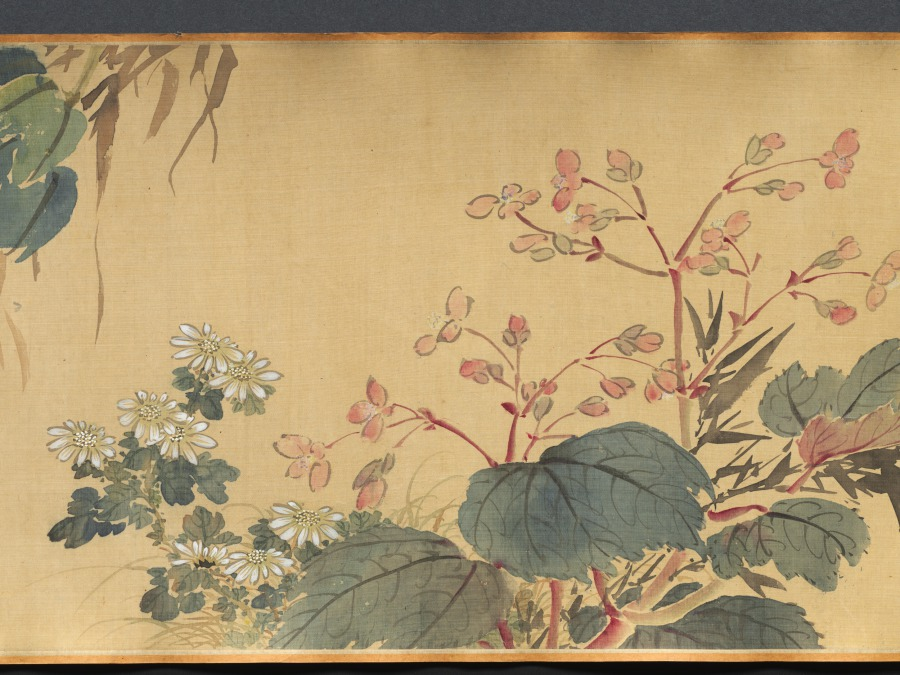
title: Flowers of Four Seasons, with Poems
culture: China, Ming dynasty (1368–1644)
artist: Wang Guxiang (Chinese, 1501–1568)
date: 1531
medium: handscroll; ink and light color on silk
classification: Painting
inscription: Artist's inscription, signature, and 15 seals. Ink Orchids. Sewn as pendants for the man of worth, swaying quiety, fragrance in the valley. [seal] Hsiao-chu ts'un Peony. Wiping his face, the young gentleman Ho [Ho Yen of Wei, Three Kingdoms] appears to have been powdered. His previous life was the perfume-stealing Han Shou [of Chin, 265–419 CE], the fragrance still lingers. [seal] Ts'un-wu chai. Flowering Crab Apple, New Bamboo. Shao-lin [Du Fu, 712–770] had to put down his brush. [Flowering Crab Apple]. Yü-k'o [Wen T'ung, d. 1079) in vain wrote poems about [Bamboo]. [seal] Yu-shih. Lotus Flowers. When she turns her head, half-hidden by a fan, and casts a glance, all the beautiful women become colorless. [seal] K'ang yüeh huai. Loquat. Ripeness in summer. [seal] Lu-chih. Pomegranate Flower. Whenever I remember you I will send my thoughts, but where have you gone--the [skirt] of pomegranate red? [seal] Wu-ho Sheng. Day Lily. Plant the day lily to forget sorrow. [seal] Yu-shih. Chrysanthemum. The untrammelled joy at the eastern fence. [seal] Lu-chih. Begonia. Comparing it to the beauties of Spring, and spreading them out as trimming for the stone steps. [seal] Yu-shih. Hibiscus. In recent years I have always enjoyed looking at flowers; instead of dark red I preferred pink ones. [seal] Jen-sheng i-lou. Narcissus, Camellia. The jade girdle left behind at Lo River. [Narcissus]. The precious pearls glitter before Spring. [Camellia]. [seal] Lu-chih. Heavenly Bamboo (Nandina domestica). A single branch in the wintry season. [seal] K'ang yüeh huai. Plum. Fragrant snow in the Lo-fou Mountains. [seal] Ts'un-wu chai. In the eleventh lunar month of the hsin-mao year of the Jiaqing era [1531], [I] imitated the boneless style of Yüan masters in sketching from life. Guxiang [seals] Yu-shih; Lu-chih. Translated by Wai-kam Ho/Lingyun Shih Liu (1980)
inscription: 2 colophons and 23 additional seals: 1 colophon dated 1632, and 2 seals of Li Jih-hua [Li Rihua] 李日華 (1565–1635); 1 colophon and 2 seals of Xiang Shengmo 項聖謨 (1597–1658); 3 seals of Liang Qingbiao 梁清標 (1620–1691); 6 seals of the Jiaqing 嘉慶 emperor (r. 1796–1820); 9 seals of Ch'eng Ch'i [Cheng Qi] 程琦 (1911–1988)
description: In this painting, flowers are loosely arranged by the seasons: narcissus and peony represent early spring; yellow loquat and lotus, summer; chrysanthemum, autumn; and the plum and evergreen bamboo, winter. The artist added to each flower a poetic line of calligraphy associating each plant with a historic or legendary figure. For example, the chrysanthemum, along with the line “The untrammeled joy at the eastern fence,” refers to the poet Tao Yuanming (died AD 427) who enjoyed chrysanthemums at the eastern fence in his garden. The scroll illustrates Wang Guxiang’s mastery of free brushwork, combining light monochrome ink with transparent colors. In his inscription, Wang says he used the “boneless” style without outlines as developed during the Yuan dynasty (1279–1368). Wang was a native of Changzhou, a city in southeast China known for its rich flora and fauna, and flower-and-bird painting tradition.